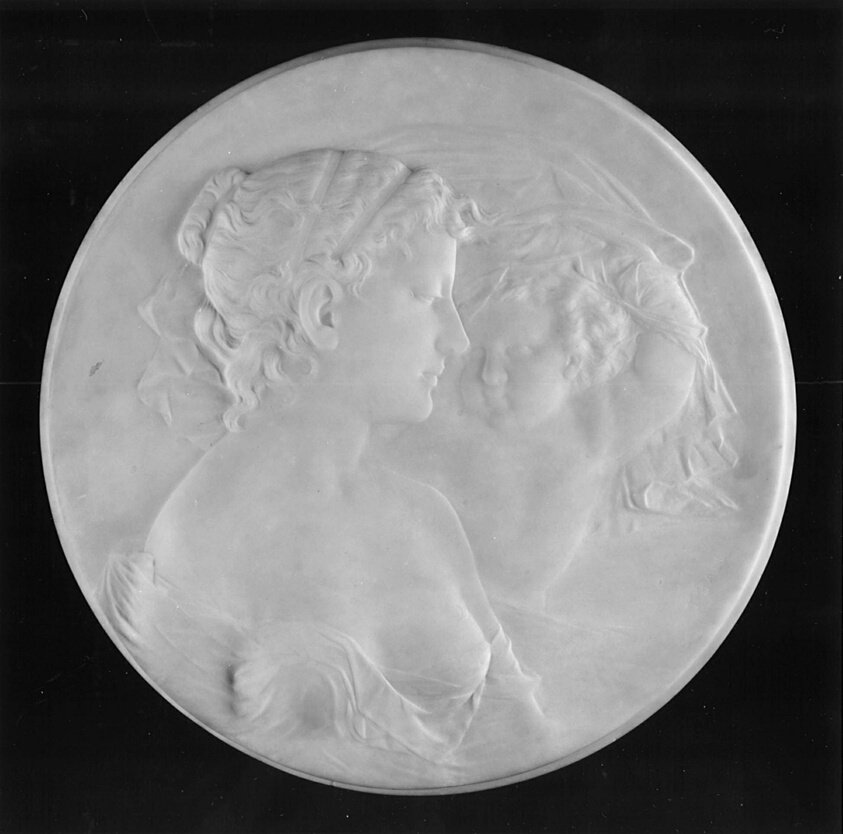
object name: Sculpture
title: Whispering Zephyr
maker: Thomas Ball (American, 1819–1911)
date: 1881–85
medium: Marble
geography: United States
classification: sculpture; american arts